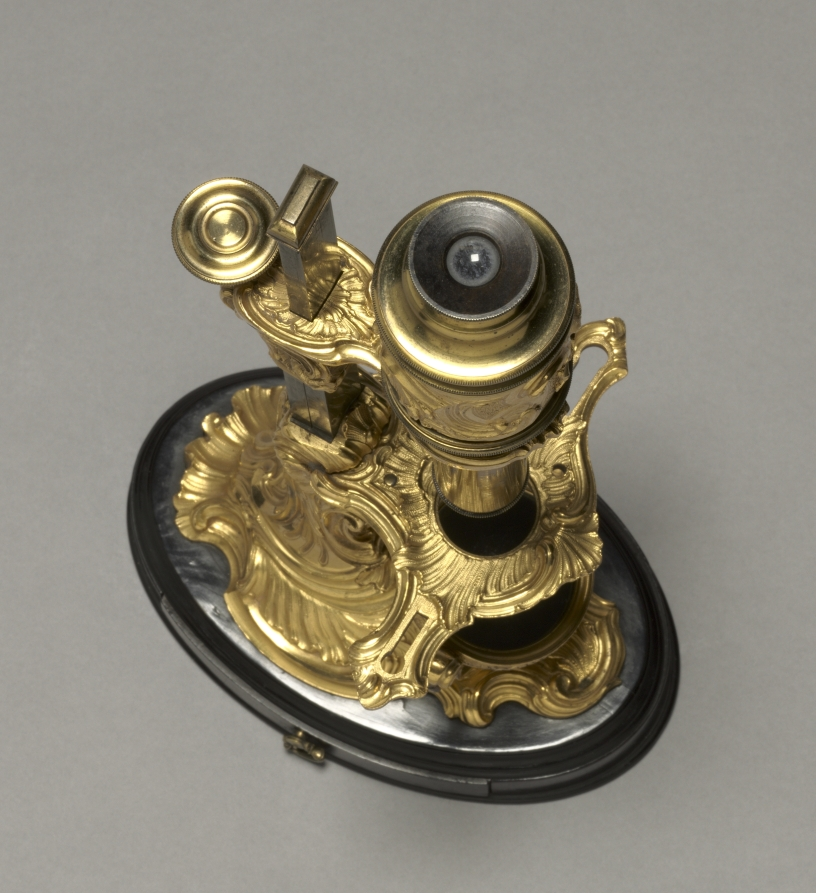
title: Microscope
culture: France, mid-18th century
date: c. 1745– 1765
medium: gilt bronze mounts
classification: Metalwork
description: Composed of elaborate gold-plated parts, this microscope is not just a decorative work of art; it is also a functional tool for scientific inquiry. Its ornamentation reflects the intermingling of art and science during the European Enlightenment, an era when scholars emphasized the study of science and reason as a means of social and intellectual progress. The two lenses of a compound microscope allow for better focus and magnification, making it easier for scientists—amateur and professional alike—to look closer at a specimen to see more than can be seen by the naked eye. This microscope’s ornate decoration suggests it was probably owned by a wealthy person, possibly an amateur scientist. A version of an 18th-century English poem playfully describes what can be newly seen with a microscope: Great fleas have little fleas Upon their backs to bite ’em The little fleas have lesser fleas And so ad infinitum.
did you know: Microscopes, especially ones as elaborate as this example, were luxurious symbols of enlightened aristocratic sophistication in the 1700s.